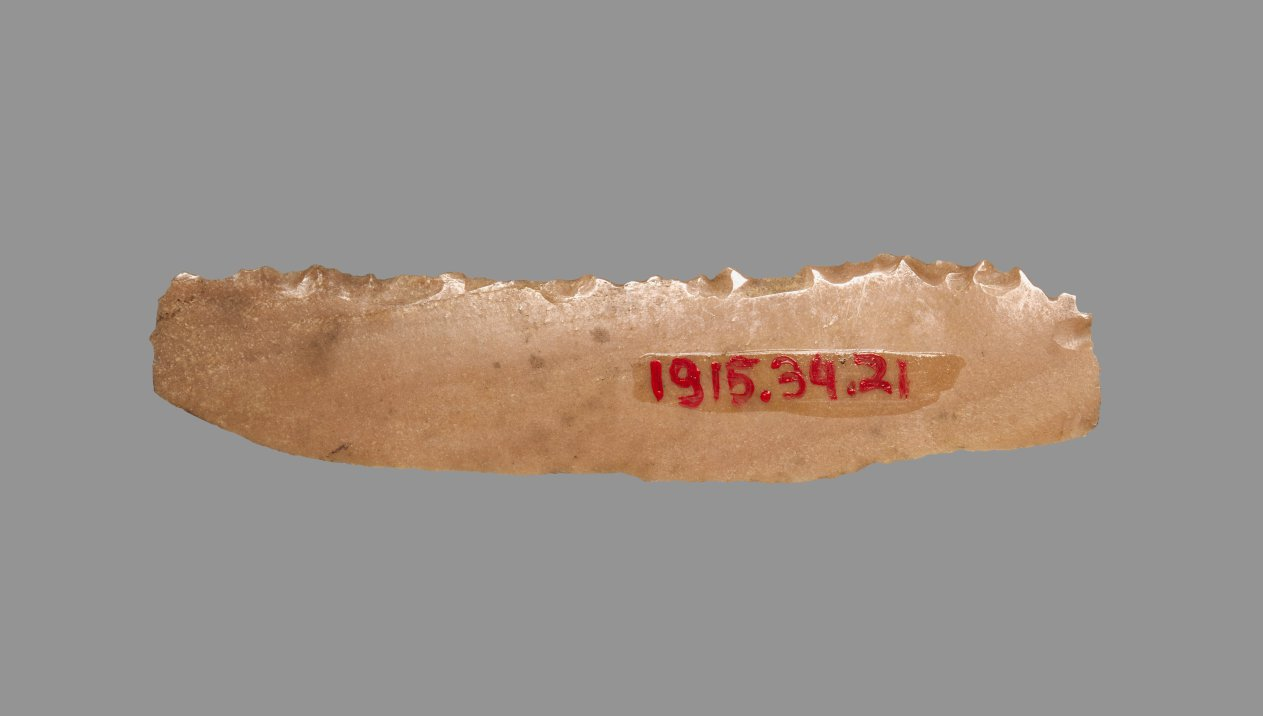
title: Sickle Blade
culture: Egypt, Middle Kingdom (2040–1648 BCE), Dynasty 12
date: 1980–1801 BCE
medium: flint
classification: Implements